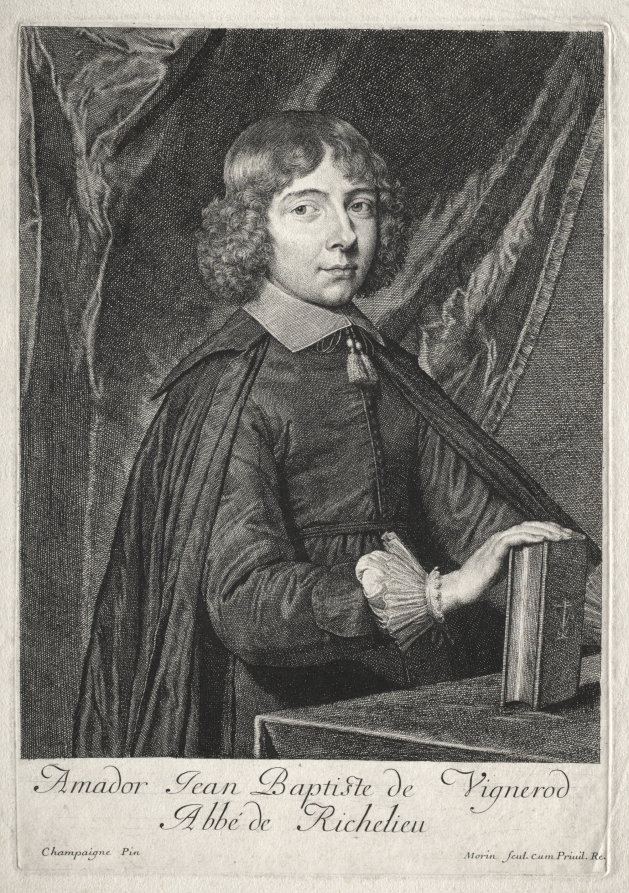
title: Jean Baptiste de Vignerod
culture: France, 17th century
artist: Jean Morin (French, 1600–1650)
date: c. 1640–50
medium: etching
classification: Print